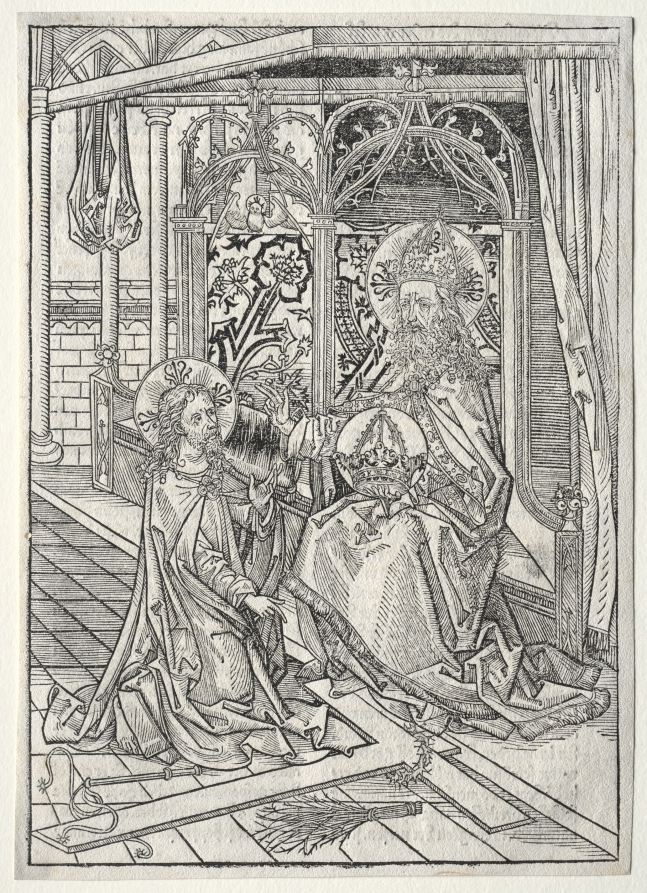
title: Der Schatzbehalter: The Trinity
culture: Germany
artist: Michael Wolgemut (German, 1434–1519)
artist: Wilhelm Pleydenwurff (German, 1450–1494)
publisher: Anton Koberger (German, 1435-1513)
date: 1491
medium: woodcut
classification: Print